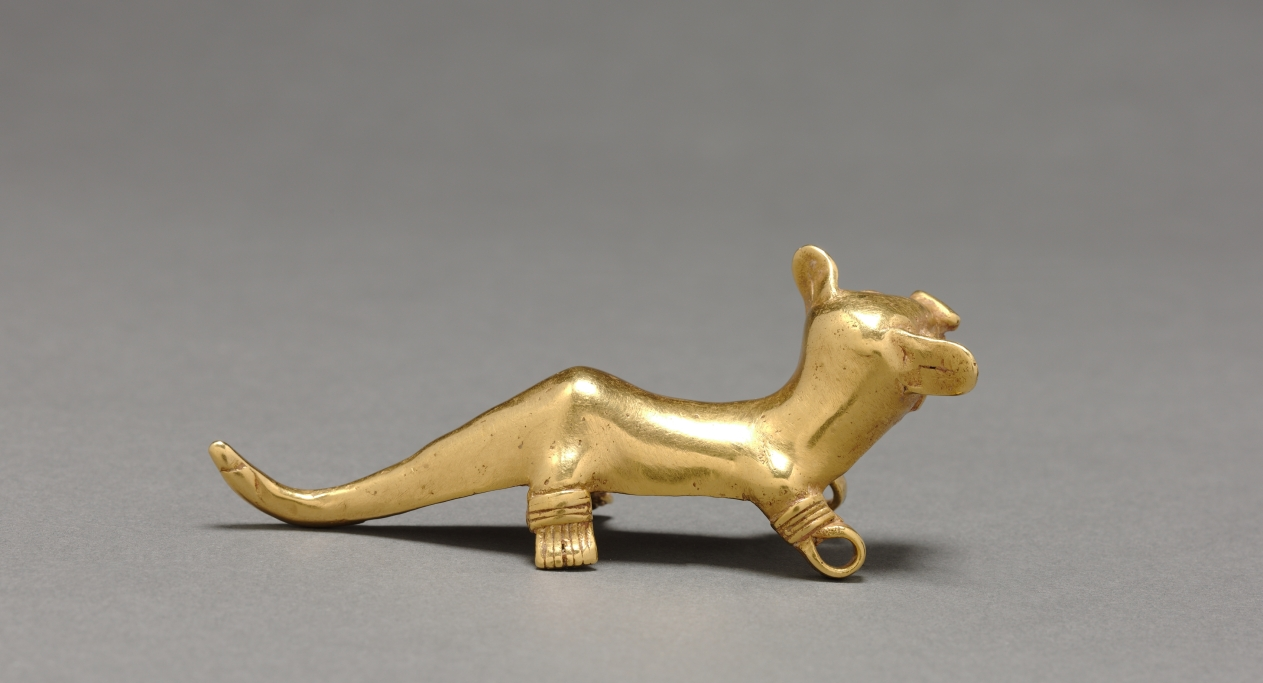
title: Feline Pendant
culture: Western Panama, Veraguas-Gran Chiriquí Style, 10th-16th century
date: c. 1000–1550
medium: cast gold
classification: Metalwork